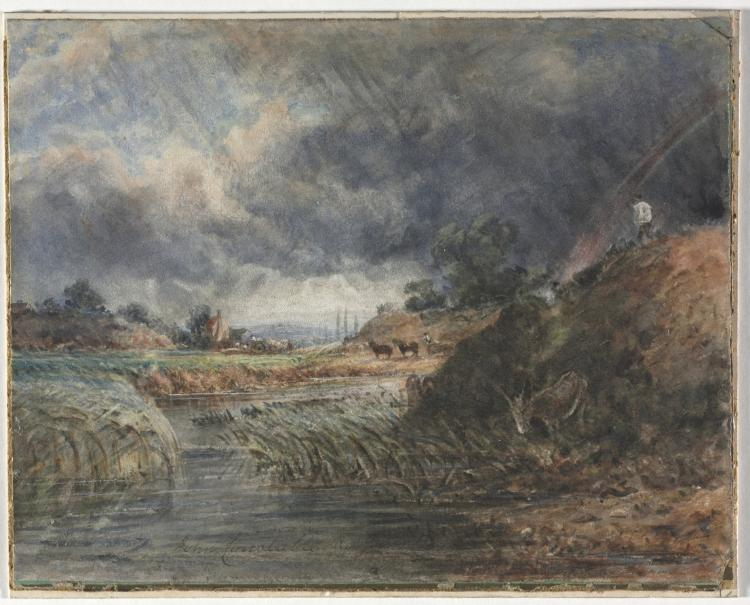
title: Hampstead Heath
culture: England, 19th century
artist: imitator of John Constable (British, 1776–1837)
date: 1800s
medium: watercolor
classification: Drawing